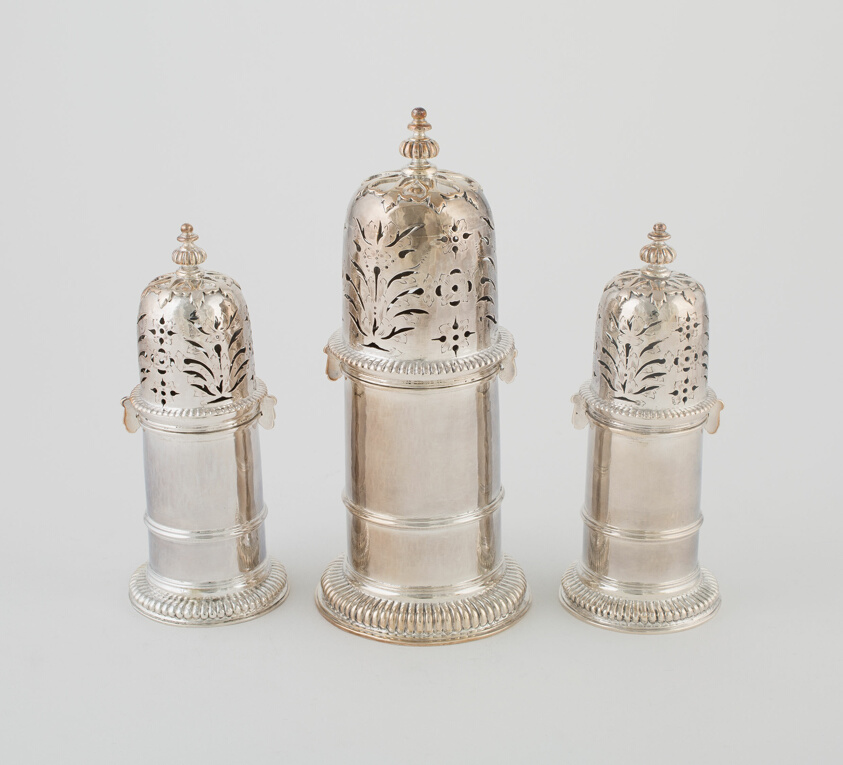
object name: Metalwork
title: Three Casters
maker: Alice Sheene; English, active 1700-02; London, England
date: 1701/02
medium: Silver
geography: London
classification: silver; metalwork; european decorative arts